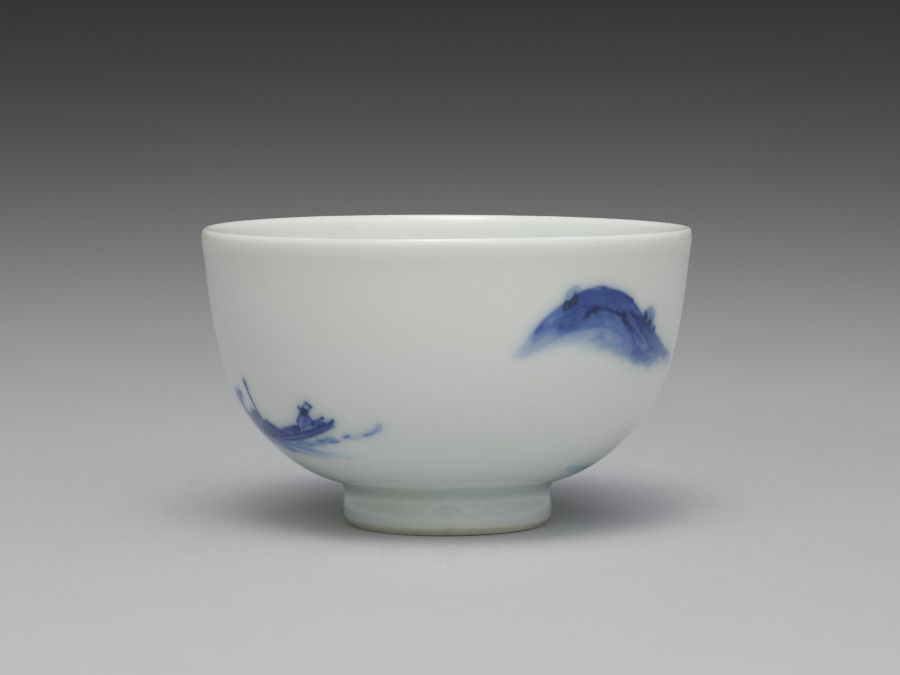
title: Teacup from Tea Set with Chinese Landscape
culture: Japan, Meiji period (1868–1912)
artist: Seifū Yohei III (Japanese, 1851–1914)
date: 1893–1914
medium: Porcelain with underglaze blue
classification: Ceramic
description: The theme of this sencha tea set is the Chinese scholar-recluse in an idyllic landscape. Each of the five teacups has a landscape with an architectural structure and some human activity. This tea set has a side-handled pot called a kyūsu, used for steeping, straining, and serving tea. Unlike some others, this set also has a yuzamashi, a container used to cool boiled water to just the right temperature for the best flavor when steeping. Seifū Yohei III’s painting teacher, Tanomura Chokunyū (1814–1907), made a visual record of famous sencha events that shows how these kinds of porcelains fit with objects such as a stove and kettle to form a complete set of utensils for tea preparation, and with ensembles of decorative objects meant to inspire creativity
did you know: This teacup shows a man with a staff walking away from a residence toward a boat, loaded with what might be a musical instrument wrapped for travel.